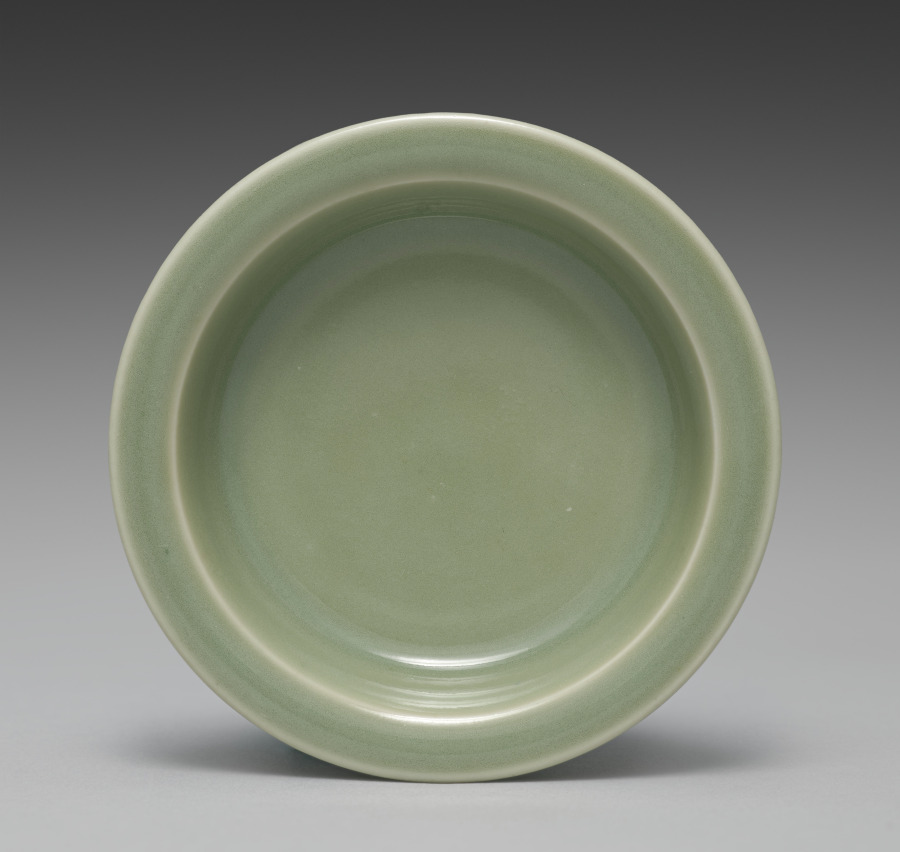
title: Saucer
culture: Japan, Meiji period (1868–1912)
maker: Seifū Yohei III (Japanese, 1851–1914)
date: 1893–1914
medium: One from a set of ten dishes; porcelain with green glaze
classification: Ceramic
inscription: 清風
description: Yohei III’s main output for his sophisticated clientele was in the form of tea sets and dining sets. He created a range of dishes in green glazes. He often produced in pairs, sets of five, or sets of ten. For this set of ten small dishes in a simple, round form that emphasizes the glaze above all, the box lid designates the piece as seiji, or green-glazed porcelain, using a general term for the extensive palette of green glazes often called celadon in English. The box lid further identifies the dishes themselves as tōchō, literally “bean-sized saucers,” a size that makes them suitable for dipping sauces.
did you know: The ten dishes in this set are stored in stacks of five in a two-compartment box.